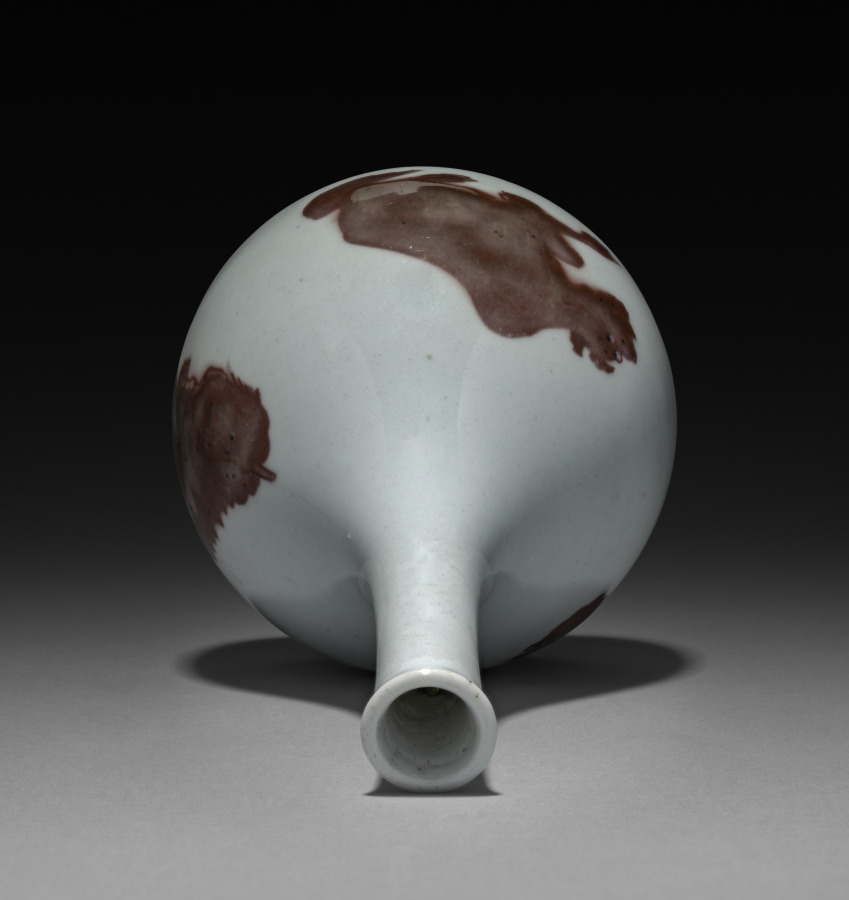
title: Bottle-shaped Vase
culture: China, Qing dynasty (1644-1911), Kangxi reign (1661-1722)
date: 1662–1722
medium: porcelain with underglaze decoration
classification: Ceramic